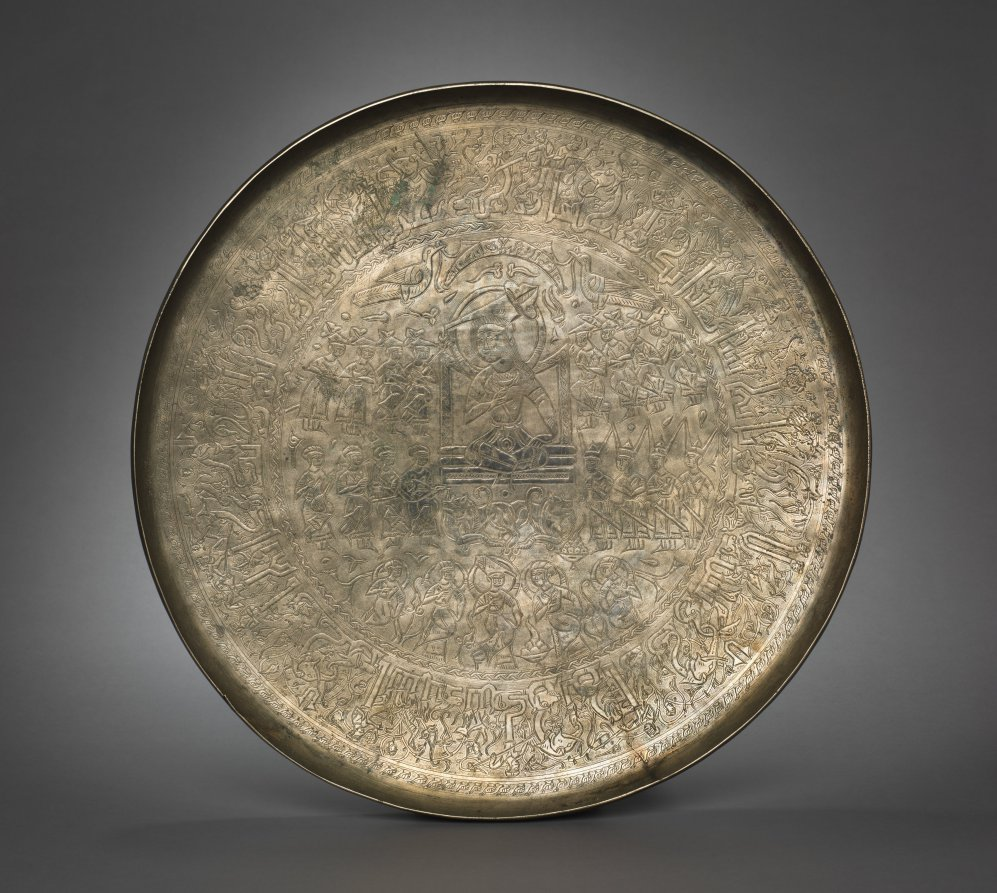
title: Salver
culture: Afghanistan, Ghaznavid Period, 12th Century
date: 1100s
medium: brass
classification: Metalwork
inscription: amal-e ibrahim-e naqqash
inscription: nawwahtum khalqan fa-sara bi'l-yamini wa'l-barakati wa'l-suroori wa'l-salamati wa'l-su'adati wa' l-nusrati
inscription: Undeciphered inscription in stylized Kufic script with human-headed, animal-headed, and foliated terminals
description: The central subject is an enthroned ruler surrounded by couriers and musicians. The wide border is filled with an elaborately animated Kufic inscription in which the shafts of the letters terminate in human busts, representing musicians and warriors; various animals; and human hands, holding a variety of symbolic objects. This complex inscription has not yet been deciphered; it appears to be in Persian and to contain only benedictory phrases. Around the outside of the rim, an Arabic inscription, in nashki letters, reads: "You elevated one [of God's] creature[s] and he has ruled with good fortune and blessing and happiness and security and felicity and victory." That the scene does not refer to a specific royal personage but is rather only a representation of the abstract concept of the "Heavenly Banquet" as a symbol of apotheosis indicated by the banner held over the head of the enthroned figure, which actually proclaims this vessel to be "the work of Ibrahim the Decorator [or the Engraver]."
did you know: The distinctively horned hats are seen on other artworks of the Ghaznavid period (977–1186).